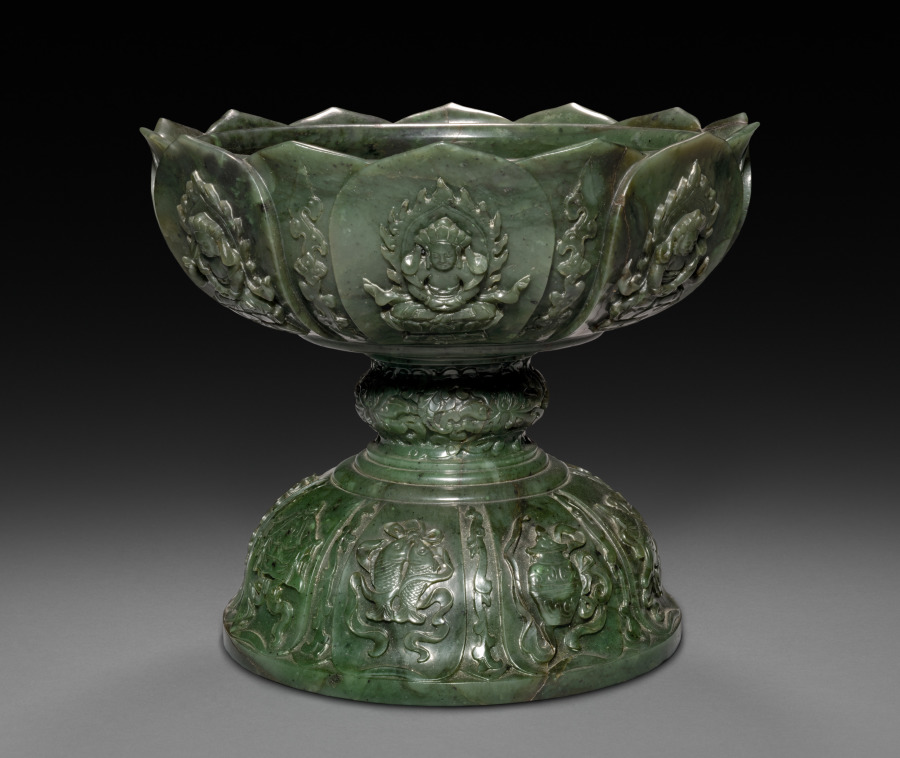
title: Offering Container in Form of Alms Bowl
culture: China, Qing dynasty (1644-1911)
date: 1700s or later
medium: jade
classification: Jade